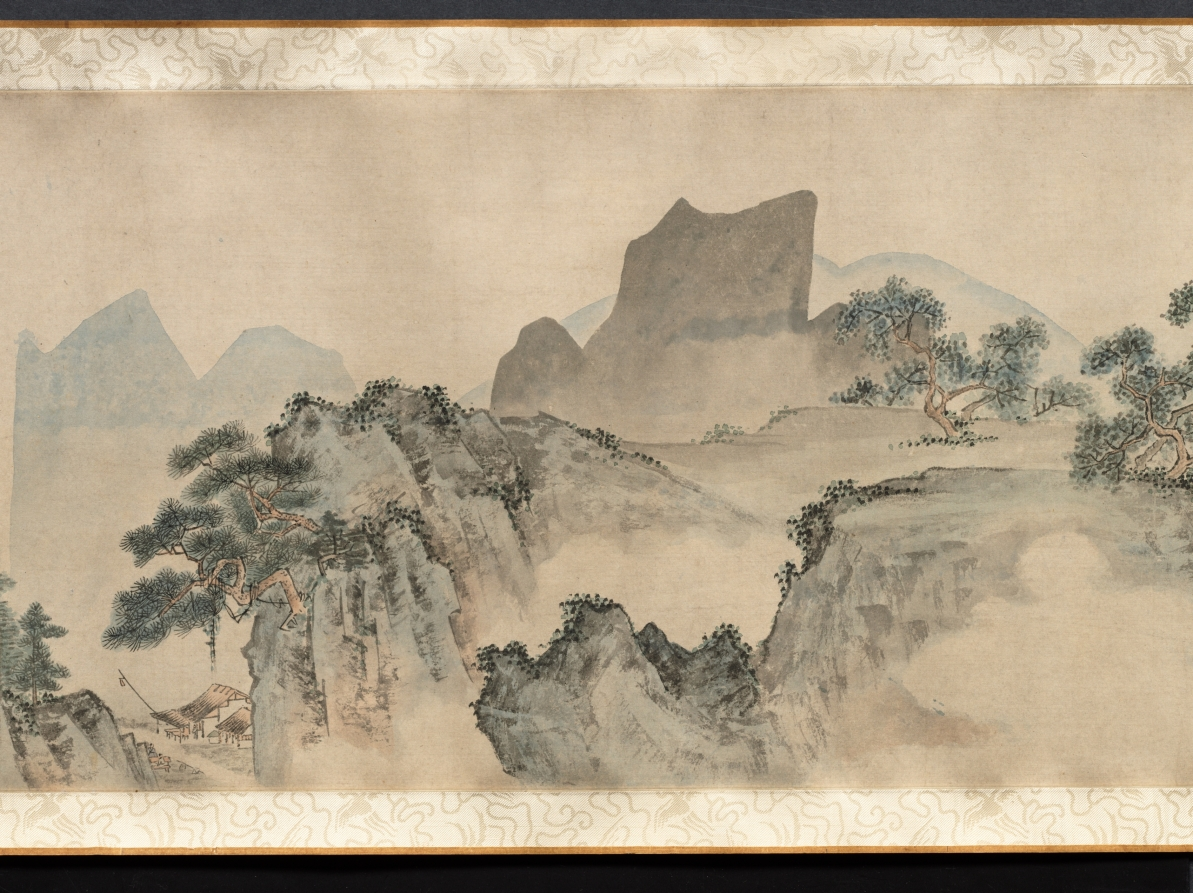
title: Ten Thousand Li of the Yangzi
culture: China, Ming dynasty (1368–1644)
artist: Dai Jin (Chinese, 1388–1462)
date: c. 1400s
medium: Handscroll; ink and color on paper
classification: Painting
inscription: Two colophons at end. Artist's seals: Dai Jin 戴進 and Wenjin 文進.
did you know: Dai Jin is traditionally considered the founder of the Zhe School, a style of landscape painting.